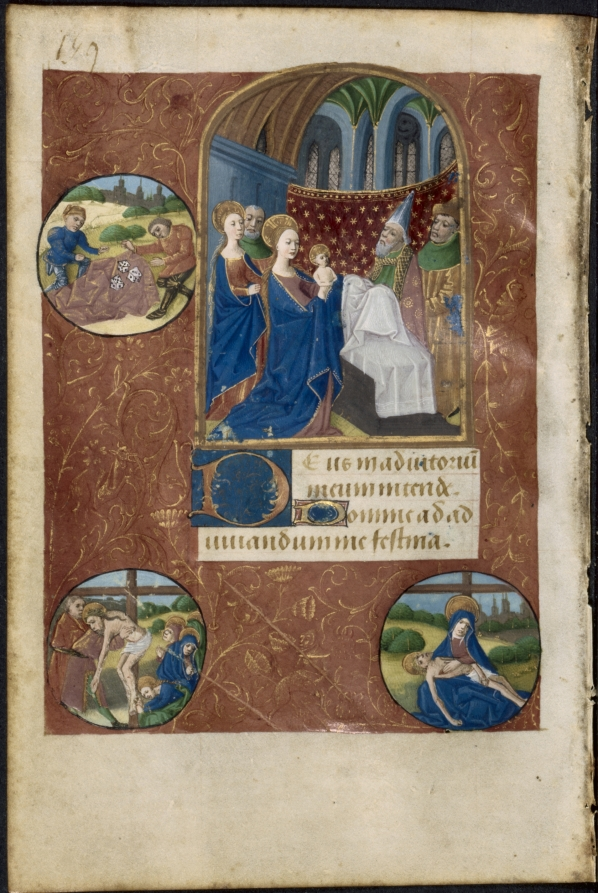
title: Leaf from a Book of Hours: Presentation in the Temple with Roundels of the Casting of Lots, the Deposition, and Pietà (None, Office of the Virgin)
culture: France, probably Poitiers, 15th century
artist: follower of Master of Adélaïde de Savoie (French, active c. 1450–70)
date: c. 1460–70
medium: ink, tempera and gold on vellum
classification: Manuscript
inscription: Deus in adiutorium meum intende. Domine, ad adiuvandum me festina.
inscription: Oratio: Omnipotens sempiterne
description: The style of this miniature, with its oval faces, abundant draperies, and use of border roundels, follows very closely the characteristics of the Master of Adélaïde de Savoie, who takes his name from a book in Chantilly (Musée Condé, MS. 1362). His activity points to Poitiers in western France as a possible place of production for this piece. The miniature features the unusual placement of roundels showing scenes taken from Christ's Passion against an episode from the life of the Virgin. The main miniature, the Presentation in the Temple, depicts the bringing of the infant Jesus to the Temple forty days after his birth to be consecrated according to Jewish law. During the ceremony, the temple's priest, Simeon, foretold that "Mary's heart would be pierced through her child." The roundels visually dovetail the central miniature.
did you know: The images and decorated initials in the book helped users navigate to sections they needed while also offering details to provoke meditation and prayer, leading to books of hours sometimes being referred to as “painted prayers.”